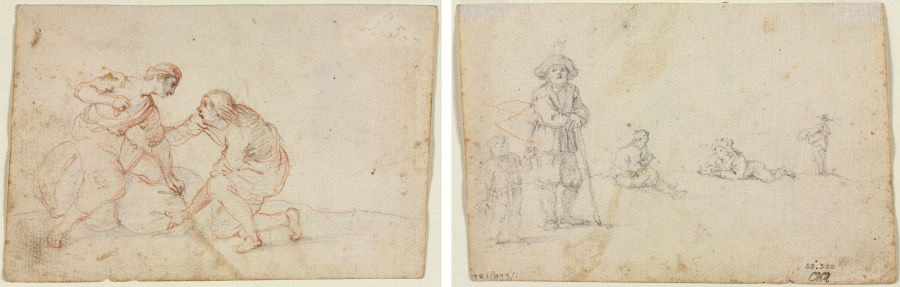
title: Two Men Tying a Bundle (recto) Five Figure Studies (verso)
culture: France, 17th century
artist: Anonymous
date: 1600s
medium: graphite and red chalk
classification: Drawing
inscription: upper right, in graphite: L 5 - (partially erased)